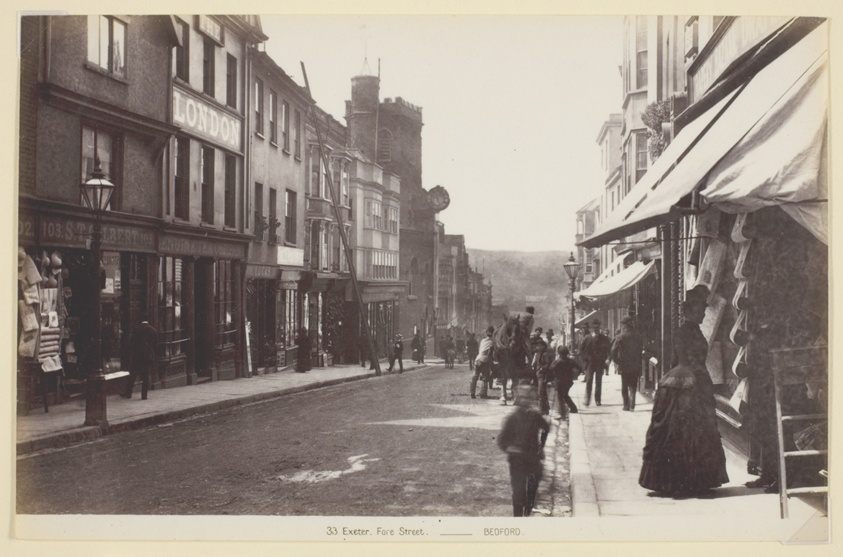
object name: Photograph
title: 33 Exeter, Fore Street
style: 19th century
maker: Francis Bedford (English, 1816–1894)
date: 1860/94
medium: Albumen print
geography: England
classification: albumen silver print; photographic process; photography; photograph